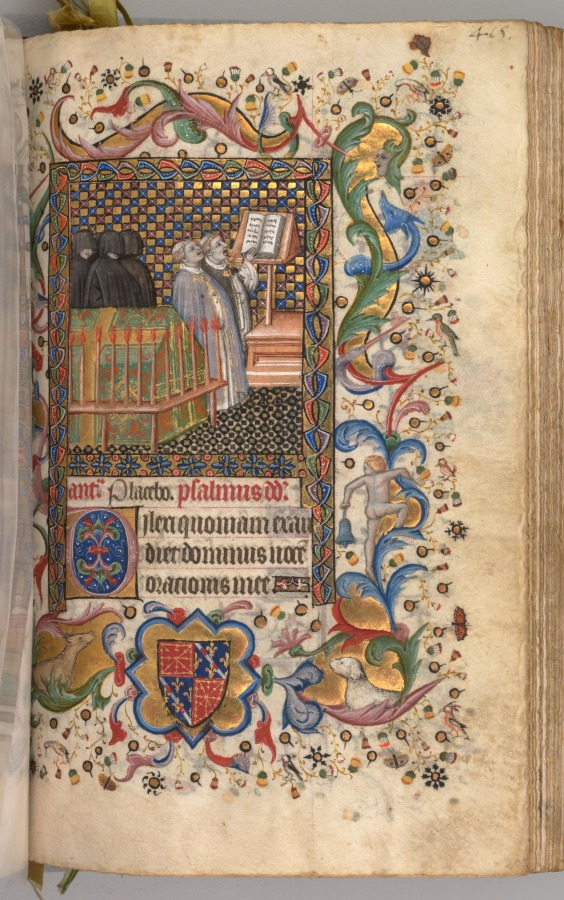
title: Hours of Charles the Noble, King of Navarre (1361-1425): fol. 202r, Office of the Dead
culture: France, Paris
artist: Master of the Brussels Initials and Associates (French)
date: c. 1405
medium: ink, tempera, and gold on vellum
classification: Bound Volume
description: This precious volume was obviously highly prized by its owner, the French-born King of Navarre, who had his coat of arms painted on no less than twenty folios. Rather than directly commissioning this manuscript from a specific workshop, it seems that Charles the Noble acquired his book of hours -- perhaps ready-made for the luxury market -- while on a trip to Paris in 1404-05. A collaborative effort, six painting styles are evidenced within the pages of this codex, those of two Italians, two Frenchmen, and two Netherlanders. The painter who was responsible for the planning and decoration of the book, and who produced seventeen of the large miniatures, was a Bolognese artist known as the Master of the Brussels Initials. His principal assistant, responsible for most of the borders, was a Florentine who signed his name "Zecho" da Firenze on folio 208 verso.